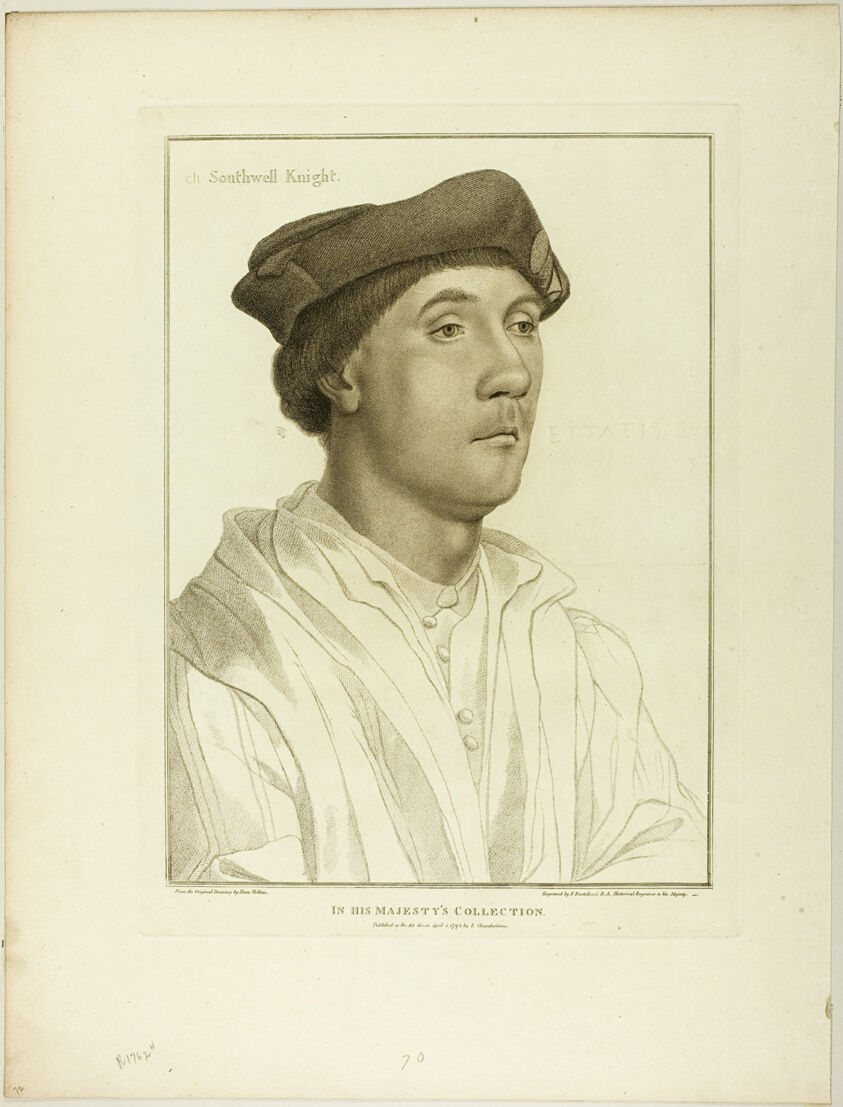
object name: Print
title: Sir Richard Southwell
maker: Francesco Bartolozzi (Italian, 1727-1815); after Hans Holbein the younger (German, 1497-1543)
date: April 1, 1795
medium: Stipple engraving on cream wove paper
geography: Italy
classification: engraving; print; prints and drawing